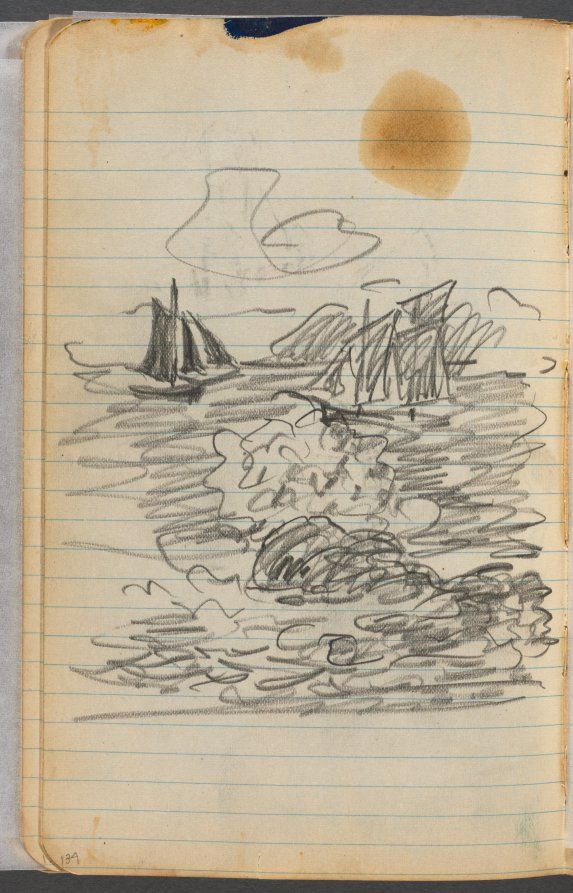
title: Sketchbook, page 134: Marine View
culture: America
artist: Maurice Prendergast (American, born Newfoundland [now Canada], 1858–1924)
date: 1905–10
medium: graphite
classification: Bound Volume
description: This sketchbook contains 69 pages of drawings, a diary largely devoted to the state of the artist's health, and a three-page discourse on the nature of genius and ideas.